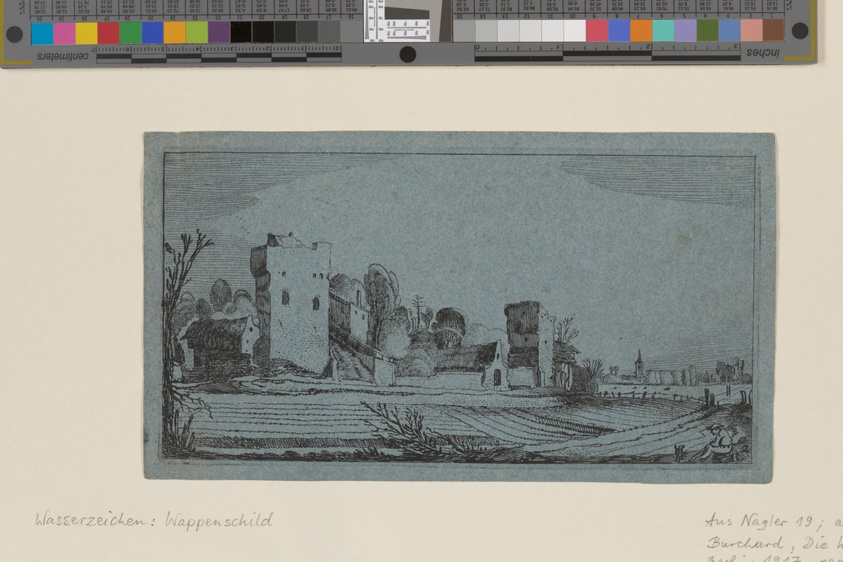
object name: Print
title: Fields Before Ruins Transformed into Farms, from Twelve landscapes with Figures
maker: After Gillis van Scheyndel; Dutch, 1595–1660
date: 1624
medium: Etching in black on blue laid paper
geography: Netherlands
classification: etching; paper; print; prints and drawing